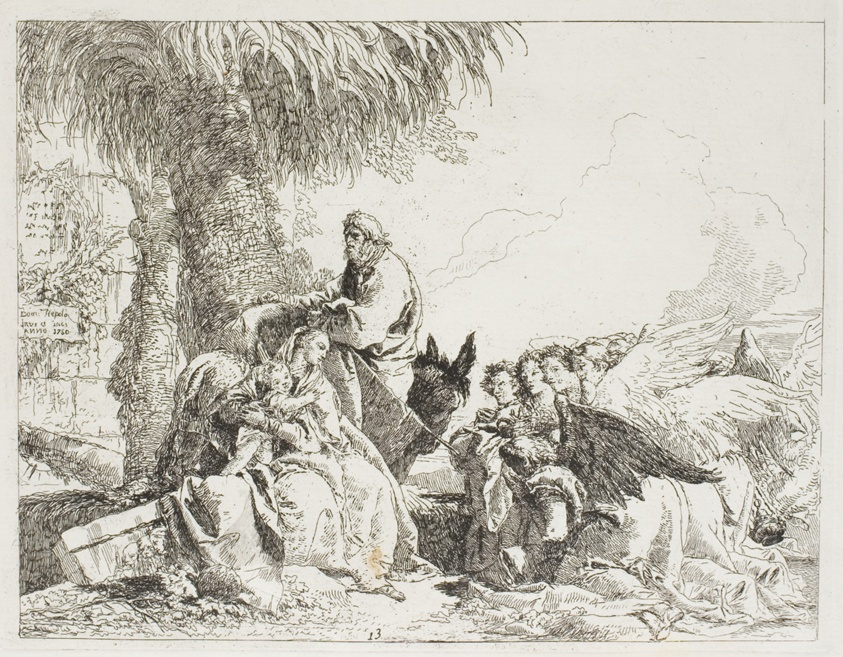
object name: Print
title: The Rest on the Flight, plate thirteen from The Flight into Egypt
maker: Giovanni Domenico Tiepolo (Italian, 1727-1804)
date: 1750, published 1753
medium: Etching on paper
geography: Italy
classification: etching; print; prints and drawing